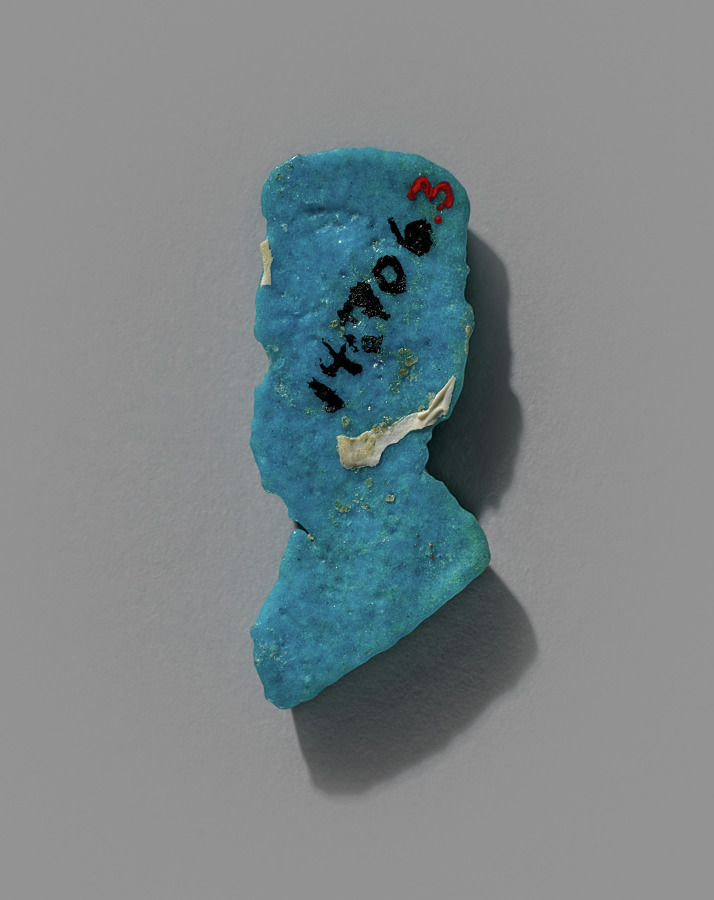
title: Food Model Amulet: Haunch of Beef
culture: Egypt, New Kingdom (1540–1069 BCE), Dynasties 19–20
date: 1295–1069 BCE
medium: turquoise faience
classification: Amulets